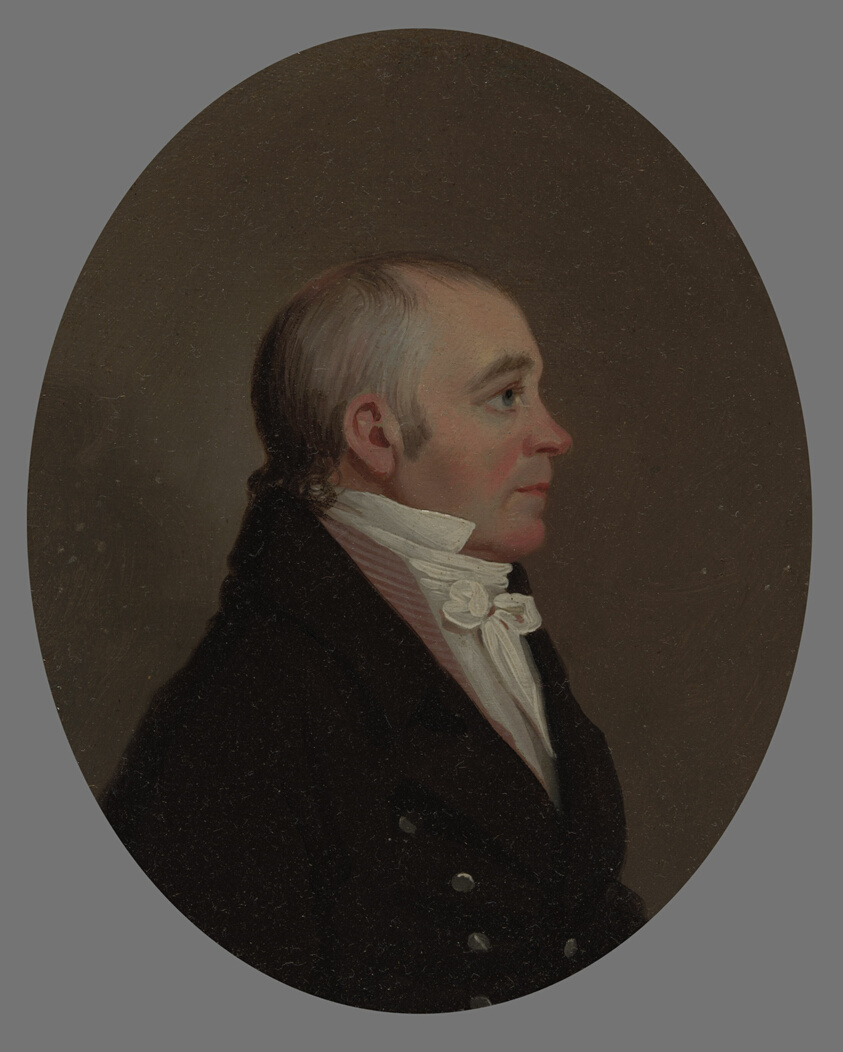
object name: Painting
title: Mr. Benjamin Schaum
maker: Jacob Eichholtz (American, 1776–1842)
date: 1808–10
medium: Oil on yellow poplar panel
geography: Lancaster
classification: painting; american arts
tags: fashion, people, portraits